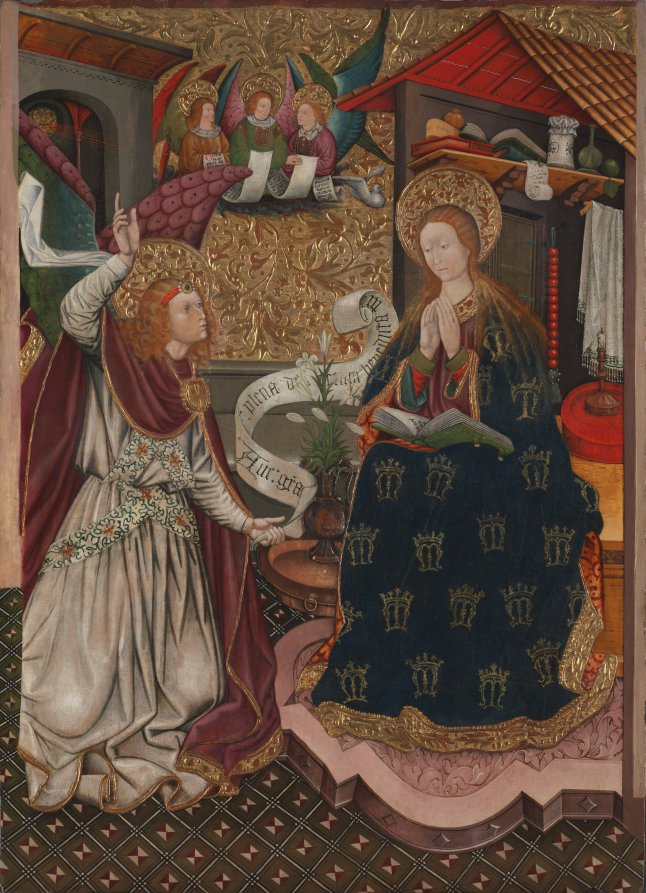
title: The Annunciation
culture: Spain, Catalonia, 15th century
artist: Jaume Ferrer the Younger (Spanish, Catalonia died c. 1460/70)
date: c. 1457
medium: oil, tempera, and gold on wood panel (fir)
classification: Painting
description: This and 1953.660.2 are believed to be the remaining components of a six-panel altarpiece. The large central panel is now preserved in Barcelona (Museu National d’Art de Catalunya). Ferrer collaborated with the painter Pere Garcia de Benavarri on this commission. Spanish works like these often feature elaborate treatment of the gold background, evident here in the exuberant raised decoration (called pastiglia) in the skies and the haloes, as well as other details. Here the archangel Gabriel proclaims the Virgin’s destiny as the mother of Christ. The setting is an ordinary house, but simple objects have symbolic meaning. The lilies represent the Virgin’s purity; the covered jar and water carafe symbolize inviolability; the pomegranate symbolizes Christ’s resurrection, while the apple alludes to humankind’s fall from grace. The towel and basin hint at ritual cleansing during Mass. The blown-out candle points to the arrival of divine light in the world. The two books, closed and open, refer respectively to the Old and New Testaments: one foretelling and the other fulfilling the promise of the messiah.